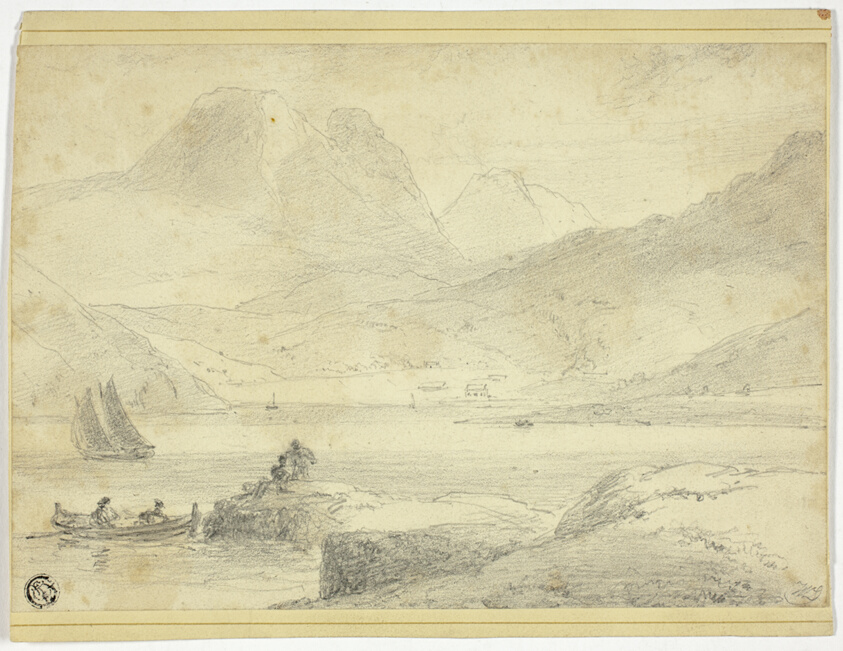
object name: Drawing and Watercolor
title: Coast of Argyllshire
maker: William Daniell (English, 1769-1837)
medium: Graphite on ivory wove paper, laid down on cream wove paper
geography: England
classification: graphite; paper; drawings (visual works); prints and drawing